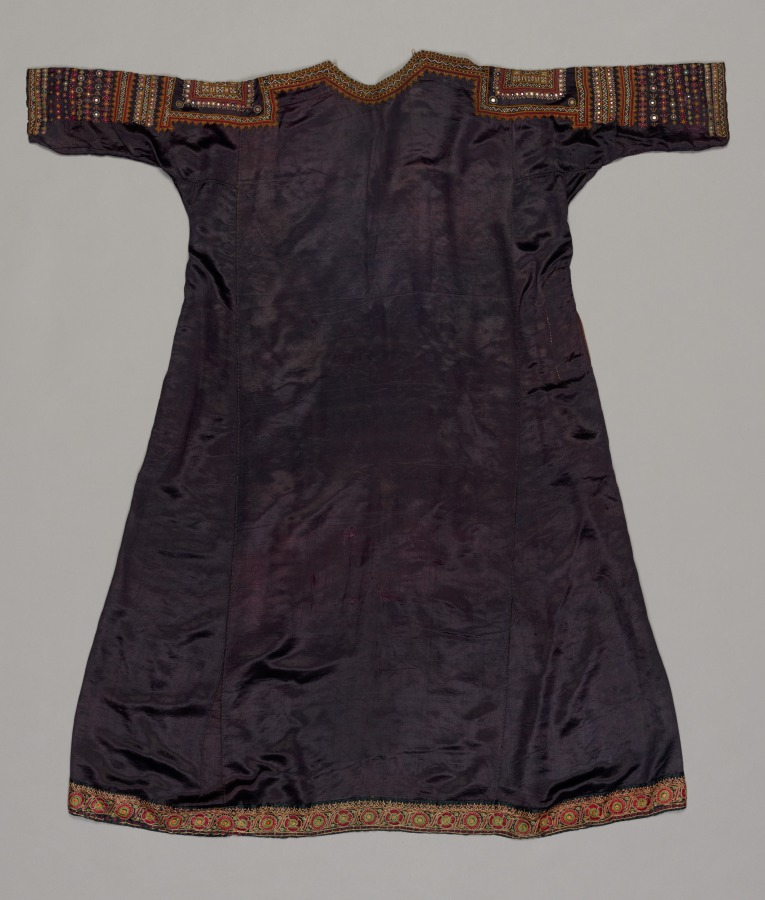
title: Dress (Choli)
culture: Western India, Gujarat, Kachchh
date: 1800s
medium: embroidery with mirror inserts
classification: Garment